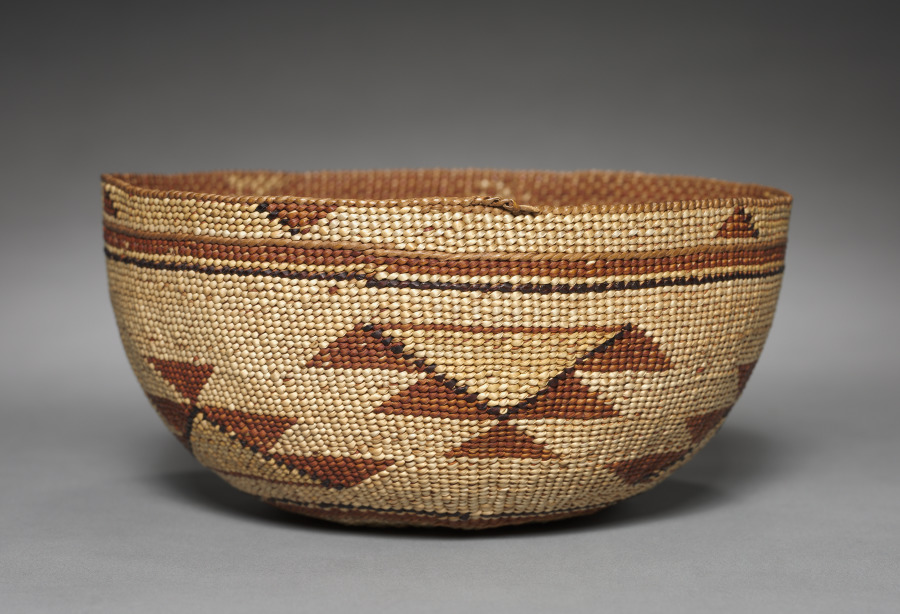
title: Hat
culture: California, late 19th- early 20th century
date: c 1875–1917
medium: plain-twined hazel with decoration in beargrass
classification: Basketry